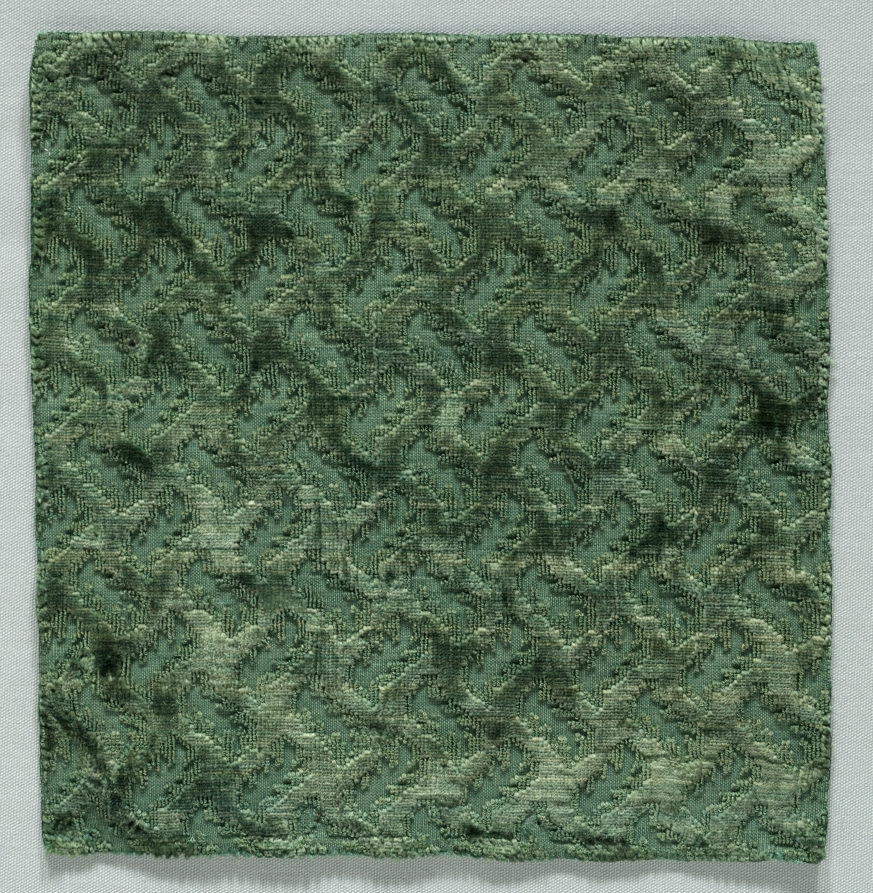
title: Velvet Fragment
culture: Italy, late 16th century to early 17th century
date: late 1500s - early 1600s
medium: velvet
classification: Velvet